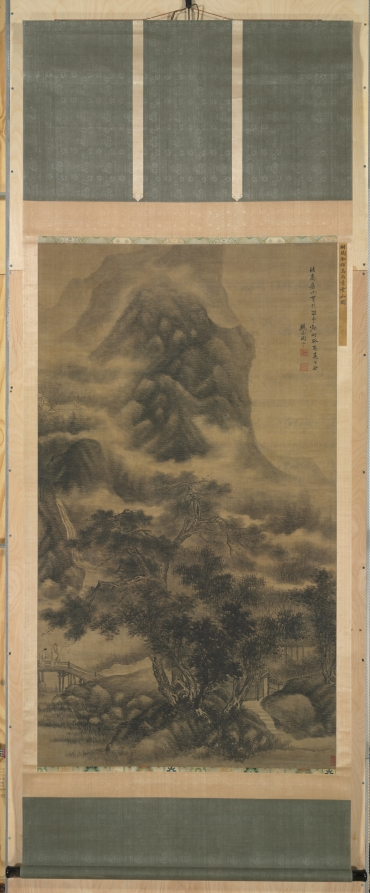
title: Clouds Visiting a Mountain Retreat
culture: China, Ming dynasty (1368–1644)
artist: Tao Hong (Chinese, active c. 1610–1640)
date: 1633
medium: Hanging scroll; ink on silk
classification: Painting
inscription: Artist's inscription, signature and two seals: Imitating Kao Fan-shan's [Kao K'o-kung's] brush at Liu-yün-ho [Valley of Lingering Clouds] during a spring day in the kuei-yu year [1633]. Yen-shan, T'ao Hung [seals] T'ao Hung chih-yin; tzu Ch'iu-shui. (Translated by Wai-Kam Ho)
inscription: 1 additional seal unidentified.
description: Little is known about Tao Hong who settled in Nanking in the latter part of his life. His son was a friend of the leading Nanjing school artist Gong Xian (on display nearby). When the Ming dynasty collapsed in 1644, Tao joined the loyalist resistance in Yunnan province. By 1645 the Manchu invaders had defeated the Yunnanese forces, prompting Tao to flee to Burma, where he died shortly thereafter. Only five of Tao Hong’s works are known to exist, of which this painting is the largest.